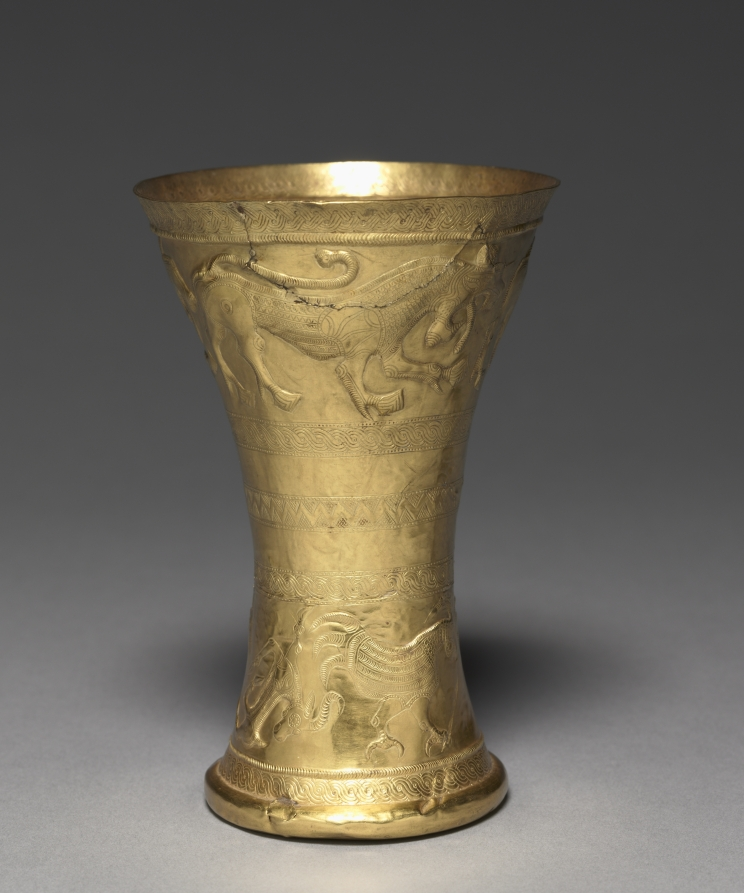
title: Beaker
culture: Iran, Marlik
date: 1100–1000 BCE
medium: gold, low relief repoussé and incised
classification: Metalwork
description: The nomadic gold- and silversmiths of Marlik and Amlash were the first masters of precious metalwork in Iran. Their successors were the bronze workers of Luristan and the silversmiths of the Achaemenian and Sasanian empires, whose masterpieces are shown elsewhere in this gallery.